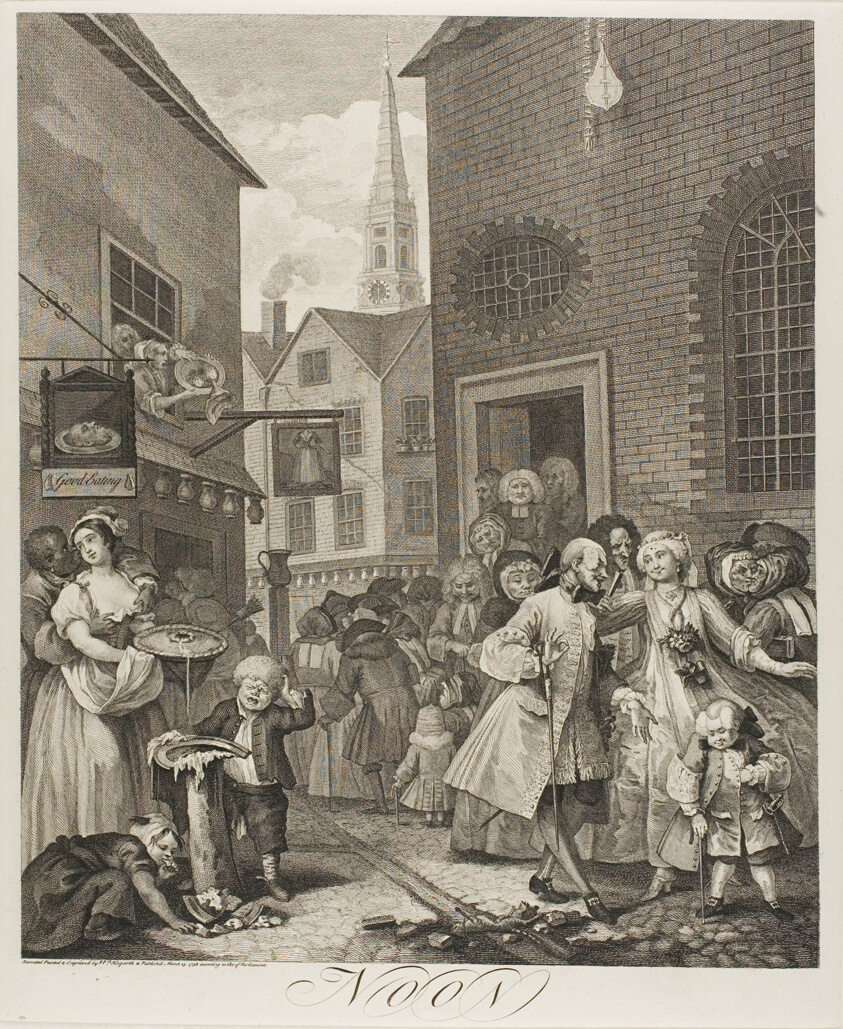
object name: Print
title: Noon, plate two from The Four Times of the Day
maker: William Hogarth (English, 1697-1764)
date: May 1738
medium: Etching and engraving in black on ivory laid paper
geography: England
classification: engraving; print; prints and drawing